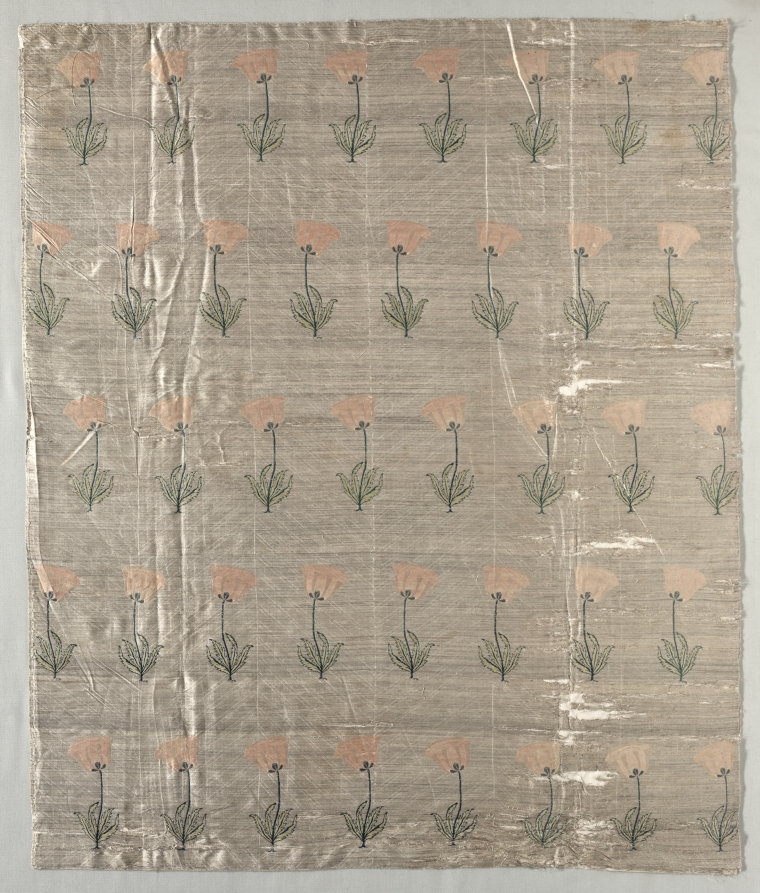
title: Textile with field of poppies on a golden ground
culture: Iran, Safavid period (1501–1722)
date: 1600–1750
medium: silk and gilt-metal thread: twill weave with supplementary weft, stamped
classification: Textile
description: Trade in textiles flourished between India and Iran. Courtly consumers from the neighboring Mughal and Safavid dynasties admired the products of both regions. The subtle chevrons set off rows of poppies that sway in alternating directions, lending a gentle liveliness to the overall pattern. Peach and green silk threads interlace to create each poppy in a technique that uses discontinuous wefts and allows for a smooth surface finish to this lightweight textile.